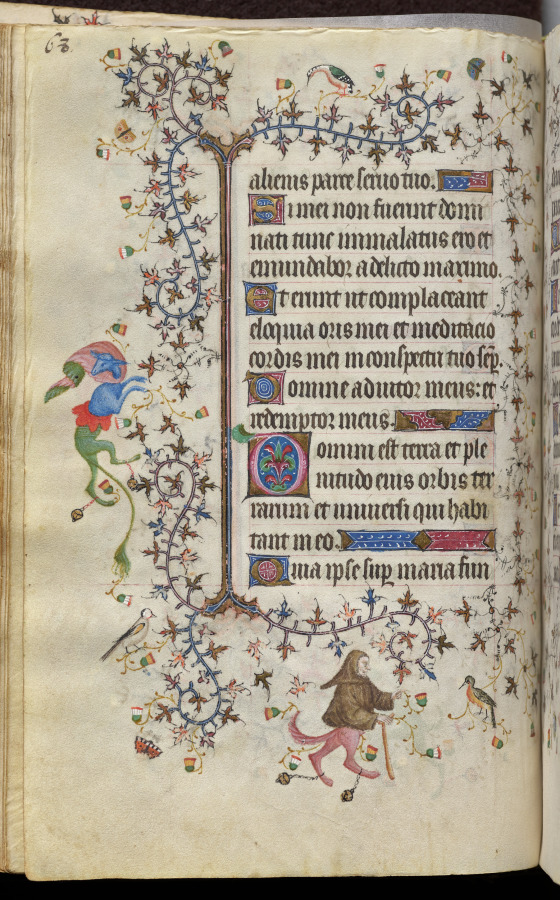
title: Hours of Charles the Noble, King of Navarre (1361-1425): fol. 34v, Text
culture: France, Paris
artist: Master of the Brussels Initials and Associates (French)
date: c. 1405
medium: ink, tempera, and gold on vellum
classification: Bound Volume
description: This precious volume was obviously highly prized by its owner, the French-born King of Navarre, who had his coat of arms painted on no less than twenty folios. Rather than directly commissioning this manuscript from a specific workshop, it seems that Charles the Noble acquired his book of hours -- perhaps ready-made for the luxury market -- while on a trip to Paris in 1404-05. A collaborative effort, six painting styles are evidenced within the pages of this codex, those of two Italians, two Frenchmen, and two Netherlanders. The painter who was responsible for the planning and decoration of the book, and who produced seventeen of the large miniatures, was a Bolognese artist known as the Master of the Brussels Initials. His principal assistant, responsible for most of the borders, was a Florentine who signed his name "Zecho" da Firenze on folio 208 verso.